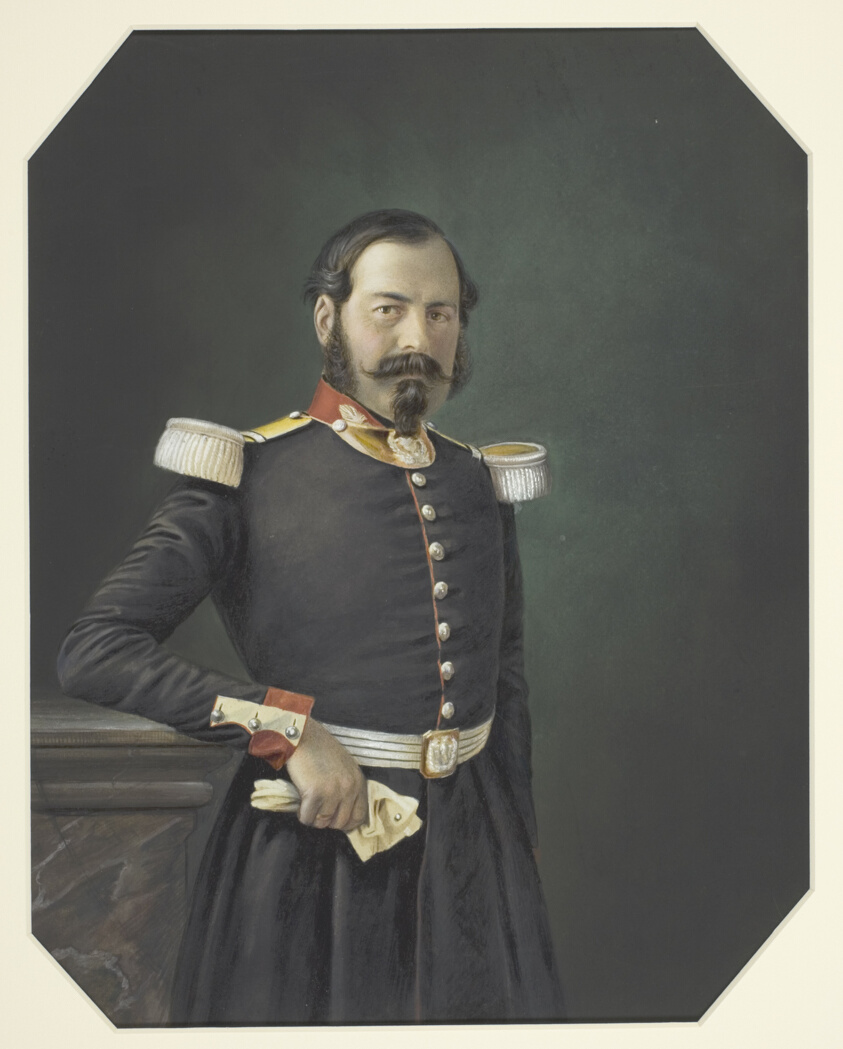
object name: Photograph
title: Portrait of a French Military Officer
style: 19th century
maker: Artist unknown; French, mid-19th century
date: c. 1855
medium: Salted paper print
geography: France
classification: salted paper print; photographic process; photography; photograph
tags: portraits, portraits: male subject, photography